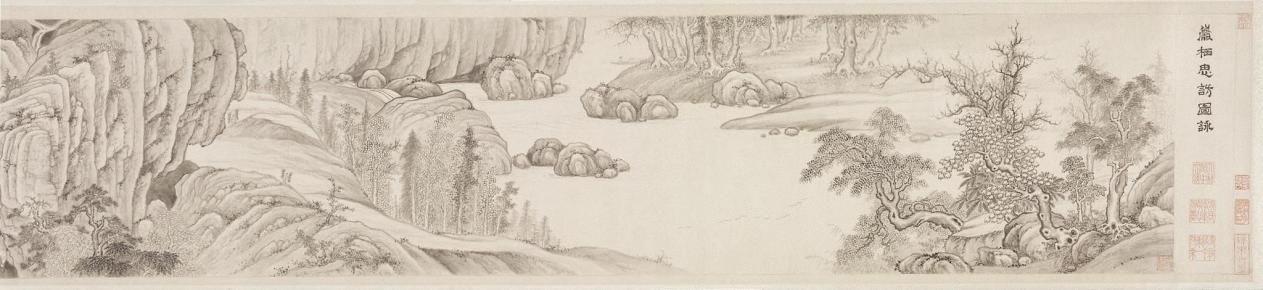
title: Meditative Visit to a Mountain Retreat: In Picture and in Words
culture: China, Ming dynasty (1368–1644)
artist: Xiang Shengmo (Chinese, 1597–1658)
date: 1648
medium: handscroll; ink on paper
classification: Painting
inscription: Artist's title and 3 seals (in front of painting): [title] Meditative Visit to a Mountain Retreat: In Picture and in Words 巖栖思訪圖詠 [3 seals] Tian lai ge zhong wen sun 天籟閣中文孫; Xiang shi kong zhang zui xin han mo 項氏孔彰醉心翰墨; Qing fu yuan zhong di yi miao ye 清福緣中第一妙業.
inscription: [印] 兔烏叟; 考古正今. 觀斯人兮何逍遙，非逍遙兮思其友。 思其友兮天一方，欲一訪之難回首。 松耶柏耶稱後凋，巖穴霏微何二酉。 山兮水兮人悠悠，遠莫致之神交否？ 河關一向望不及，言笑于今更非偶。 問游魚兮樂何深？問飛鳥兮歸何藪？ 問猿鶴兮何親疎？問鹿豕兮何夭壽？ 問白雲兮從何來？問流泉兮向何走？ 問漁樵兮何江山？問草木兮何畝畎？ 問春秋兮何炎涼？問世人兮何長久？ 問日月兮何晦明？曾見當時烏兔叟？ 戊子嘉平之初偶作此圖并題。 胥樵項聖謩識。 [印] 兔烏叟; 項氏孔彰; 未喪斯文.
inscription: 13 additional seals: 4 of Tang Zuomei 唐作梅 (late 18th–19th century); 3 of Zhang Baixi 張百熙 (1847–1907); 4 of Zhang Heng 張珩 (1915–1963); 2 unidentified.